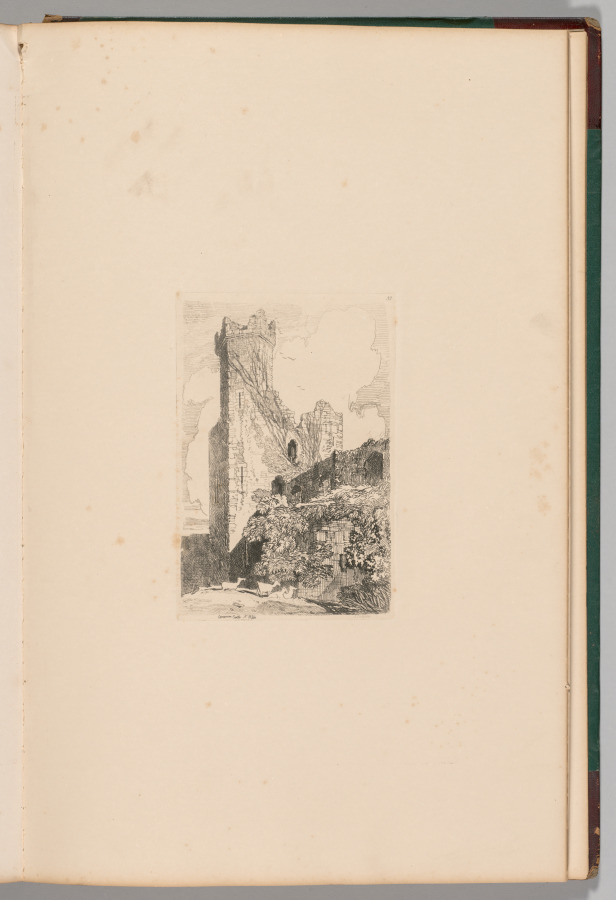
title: Liber Studiorum: Plate 32, Caernarvon Castle, N. Wales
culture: England, 19th century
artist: John Sell Cotman (British, 1782–1842)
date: 1838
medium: softground etching, from a bound volume containing 48 plates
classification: Bound Volume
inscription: In plate, within image, upper right: 32; in plate, lower left, below image: Caernarvon Castle. N. Wales; in plate, lower right, below image: JS Cotman